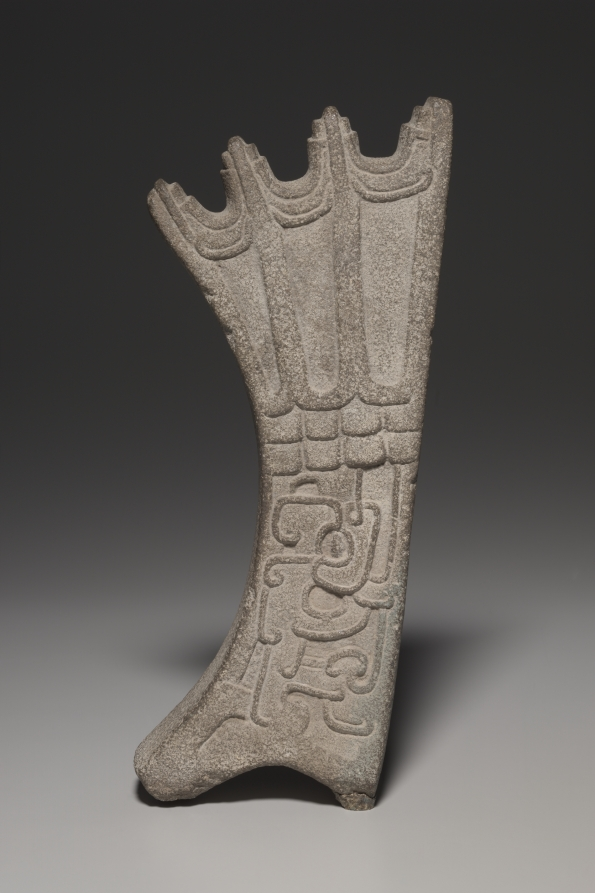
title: Ballgame Palma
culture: Mexico, Gulf Coast, Classic Veracruz style (600-1100)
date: c. 900–1100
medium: stone, pigment traces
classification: Sculpture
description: In art, ballplayers are shown wearing palmas atop hip protectors like one displayed nearby. The palma covers the chest, as if to insulate it from bruising encounters with the rubber ball. The stone sculptures are too heavy for wear but may mimic the shape of lighter-weight gear used during play. This elegant, fan-shaped palma is adorned with scrolls that form grotesque heads in profile. Traces of blue indicate that like many ancient sculptures it was brightly painted.